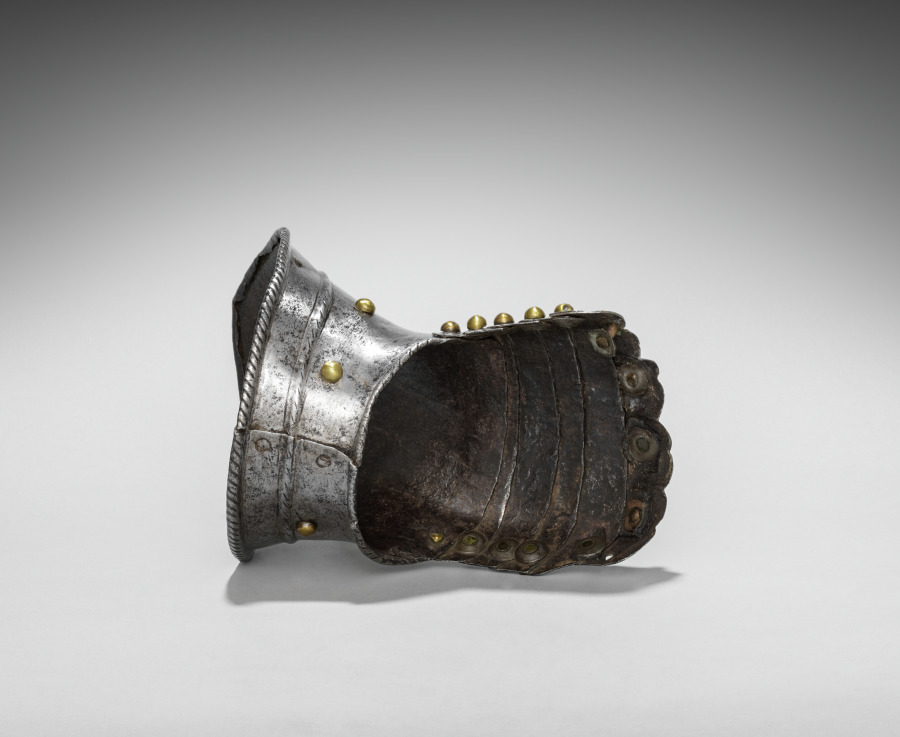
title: Gauntlet with Bell Shaped Cuff (Right)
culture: South Germany, 16th century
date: c. 1560–1580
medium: steel, leather straps, brass rivets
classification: Arms and Armor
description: This armor was developed for the joust-a sporting combat between two mounted contestants. Although all of the elements of this armor date from the same period, they are not all from the same suit. This armor is thus called "composed." It also shows the asymmetry of jousting armor. The participants rode along a wall-like barrier known as a "tilt" with their left sides facing one another. Consequently, armor on that side of the body had to be thicker. Note the large plate (grandguard) over the left shoulder for extra protection. Also, the breathing holes in the helmet were placed on the right side (farthest from an opponent's lance) to avoid injuries from splinters. The bracket attached to the right breastplate is called the lance-rest, a shock-absorbing support designed to accommodate the lance when "couched" under the right armpit.